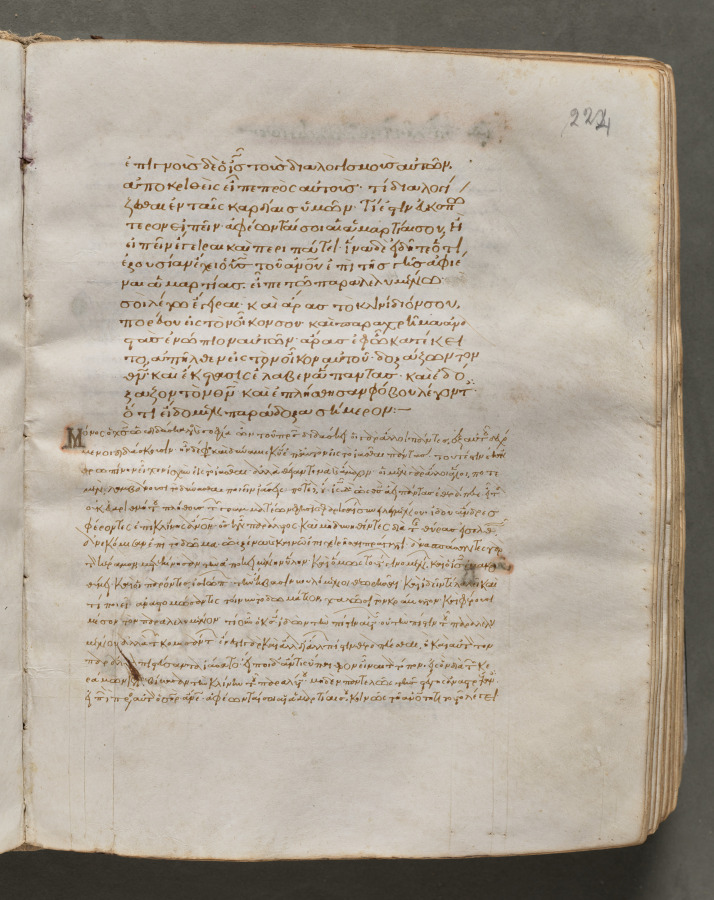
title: Text, folio 224 (recto), from a Gospel Book with Commentaries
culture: Byzantium, Constantinople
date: c. 1000–1100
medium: ink, tempera, and gold on vellum; leather binding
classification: Bound Volume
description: Each of the four gospels in this book opens on a page with brilliantly illuminated borders depicting the author of the text as well as birds-principally peacocks, symbols of the immortality of the soul-and fountains, representing the fountain of life and the salvation of the soul. This volume consists of 428 leaves with texts in Greek. Its level of sophistication suggests that it was probably written and decorated in a monastery in Constantinople.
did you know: Gospel Books were carried in procession through Byzantine churches.